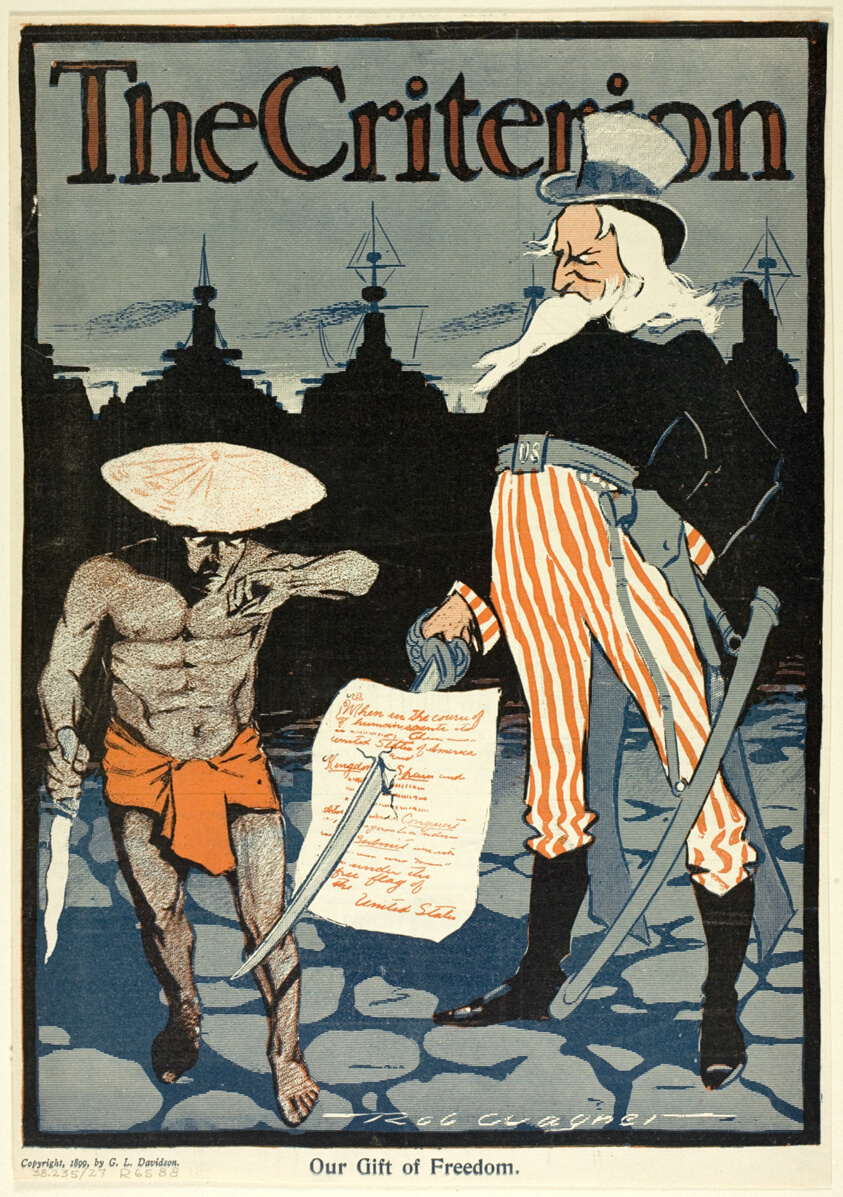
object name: Print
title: Our Gift of Freedom, from The Criterion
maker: Roc Wagner (probably American, 19th century)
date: 1899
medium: Color lithograph on newsprint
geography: United States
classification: lithograph; print; prints and drawing